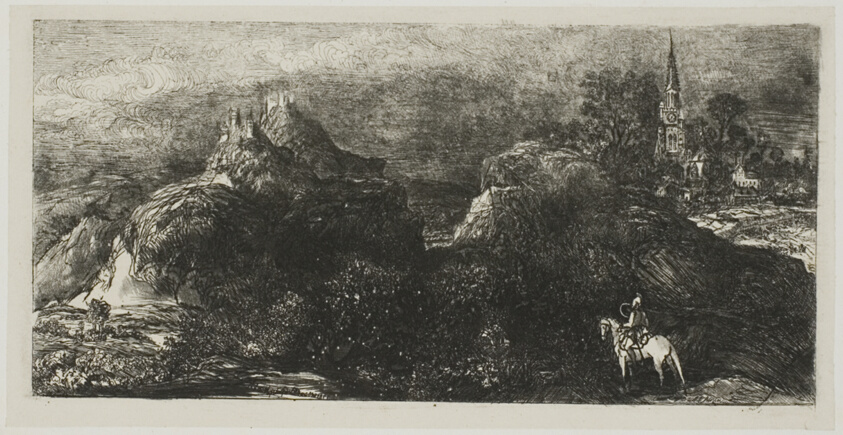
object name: Print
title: The Knight's Return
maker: Rodolphe Bresdin (French, 1825-1885)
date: 1871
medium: Etching on ivory China paper laid down on white wove paper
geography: France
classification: etching; print; prints and drawing